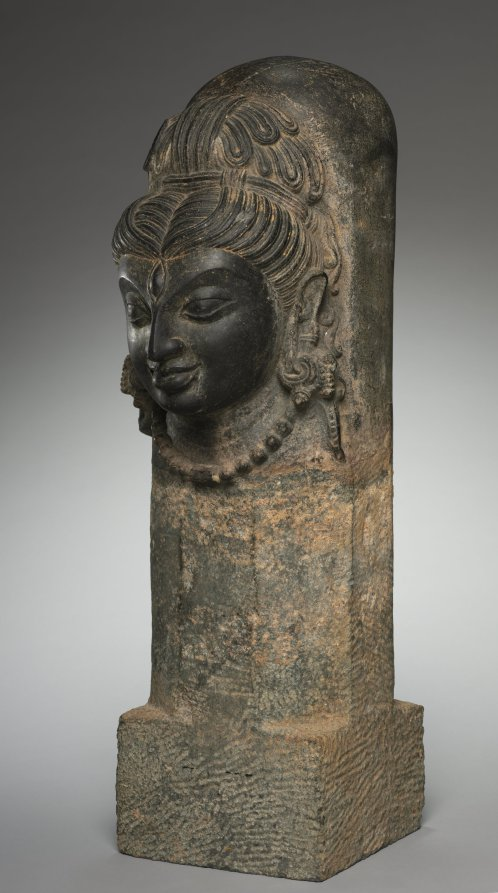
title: One-Faced Linga (Ekamukhalinga)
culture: Eastern India, Bihar, Medieval period, Pala dynasty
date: 600s–700s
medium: chloritic schist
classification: Sculpture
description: The innermost sanctum of a Hindu temple dedicated to Shiva is called a womb chamber in which a stylized phallus called a linga is installed. Together, the chamber and linga represent the potentiality of creation. Artists depict the first stage of creation by a face emerging from the phallus, which embodies one aspect of Shiva. This face is of a powerful yogi, with long matted locks adorned with a crescent moon. He has a penetrating gaze with all three of his eyes. This icon would have been accessed primarily by Brahmin priests who would perform rituals honoring Shiva as the ultimate creator of the world.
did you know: Some lingas have four faces that indicate a more advanced stage of creation.